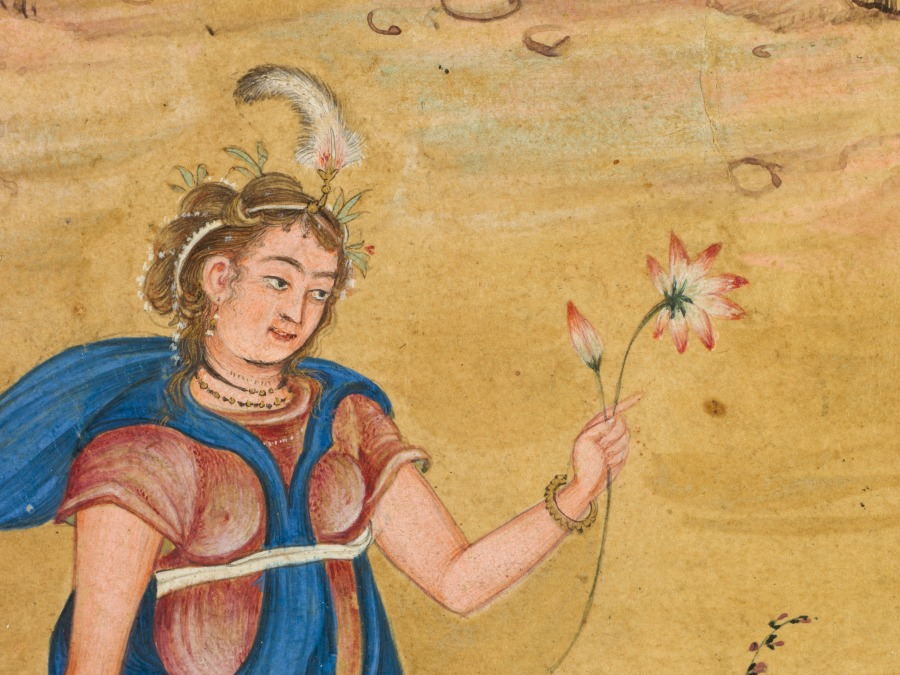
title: A female figure standing in a landscape holding a four-stringed “khuuchir” and a lotus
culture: Mughal India, court of Akbar (reigned 1556–1605)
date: c. 1590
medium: Gum tempera and gold on paper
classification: Painting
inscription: [verso, upper left, sticker] 1027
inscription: [verso, right of sticker, in pencil] 24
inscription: [verso, upper center, in pencil, upside down] VI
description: Standing over flowering sprigs, holding a lotus like a scepter, the figure seems to magically impart fertility to a desert. In pan-Indian religious iconography (system of visual symbols that identify a figure), the lotus is held by the goddess of good fortune, prosperity, and abundance, who is frequently associated with ideal kingship. The stringed instrument recalls the Indian goddess of learning and music, but here it is of a Mongolian type, as is the feather in her crown. Her garments are reminiscent of those worn by biblical and classical figures in European engravings. This painting combines Indian, European, and Mongolian references.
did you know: The four strings of the woman’s khuuchir would have been made from silk.